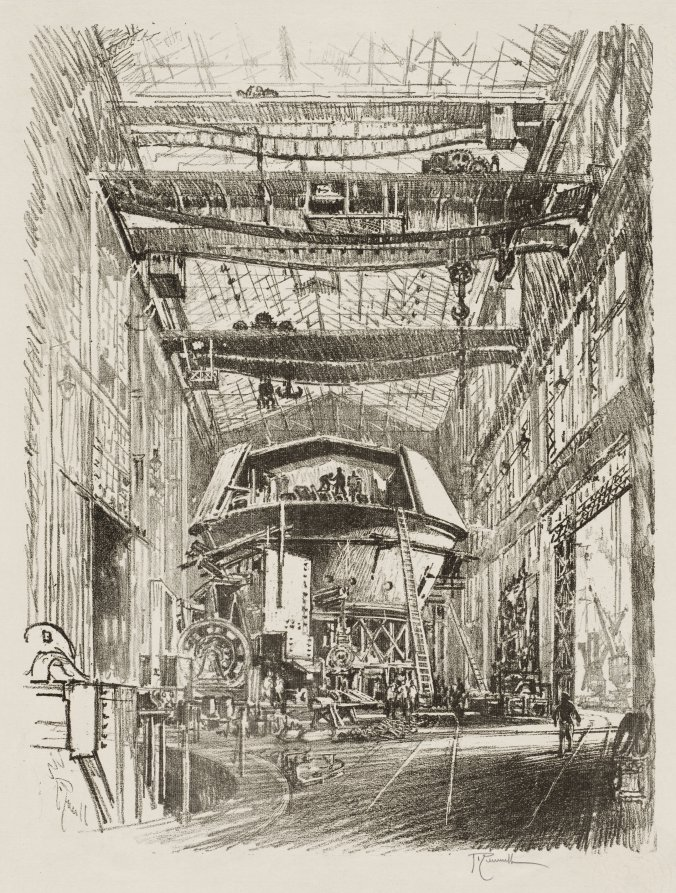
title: English War Work: Building the Great Turret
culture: America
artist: Joseph Pennell (American, 1857–1926)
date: 1916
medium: lithograph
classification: Print